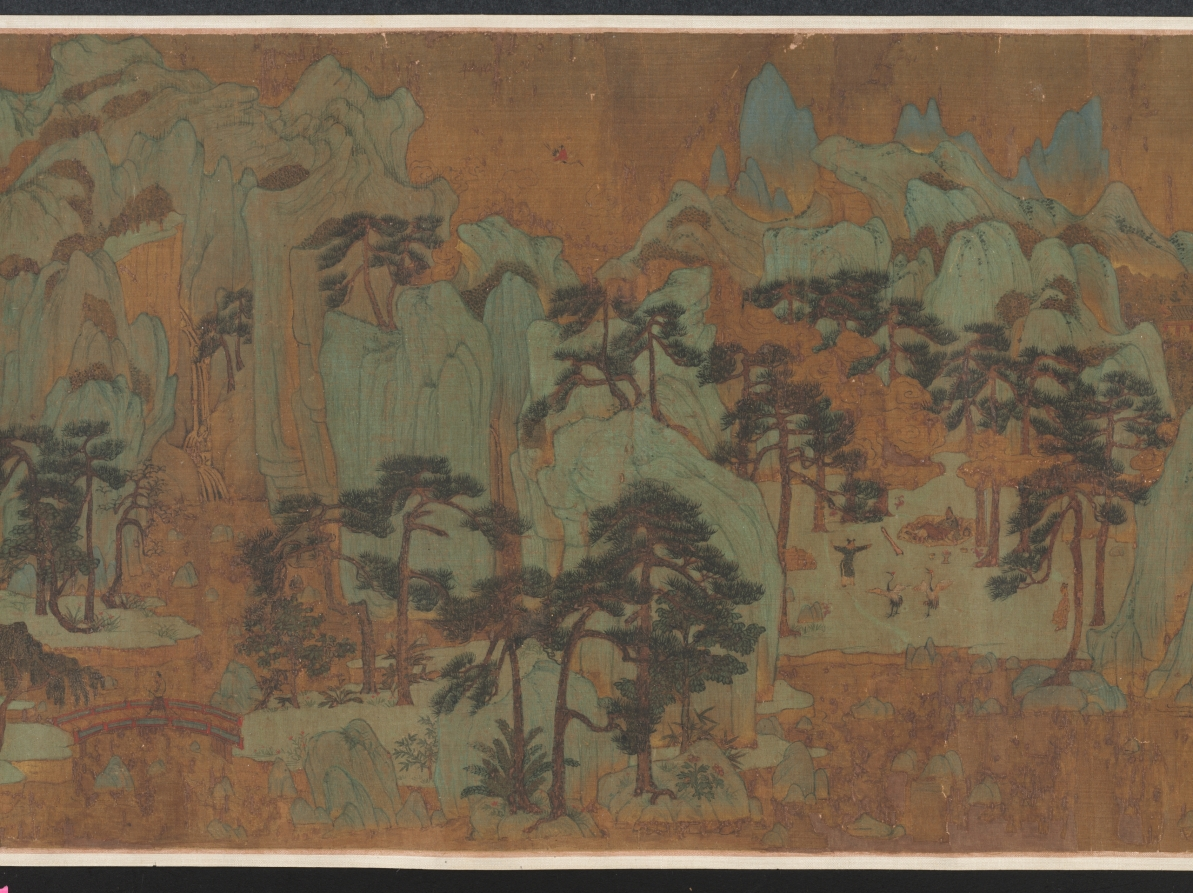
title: Mountains of the Immortals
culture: China, Yuan dynasty (1271-1368)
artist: Chen Ruyan (Chinese, c. 1331–1371)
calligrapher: Ni Zan (Chinese, 1301–1374)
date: 1300–1370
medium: Handscroll; ink and color on silk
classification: Painting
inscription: 1 inscription, 3 colophons, and 37 seals: 1 inscription, dated 1371, by Ni Zan 倪瓚 (1301-1374); 17 seals of Xiang Yuanbian 項元汴 (1525-1590); 4 seals of Chu Chih-ch'ih (late Ming Dynasty); 1 seal of Liang Qingbiao 梁淸標 (1620-1691); 1 seal of Gao Shiqi 高士奇 (1645-1704); 4 seals of Lu Xinyuan 陸心源 (1834-1894); 1 colophon, dated 1908, and 5 seals of Jing Xian 景贒; 1 colophon, dated 1915, by Lung Yu; 1 colophon, dated 1932, and 2 seals of Wu Mei; 3 seals unidentified.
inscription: 仙山圖， 陳君惟允所畫。 秀潤清遠， 深得趙榮祿筆意。 其人已矣， 今不可復得。 辛亥十二月二日倪瓚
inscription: Colophon by Jing Xian 景贒: The preceding Land of Immortals is an authentic work of the Yuan master, Chen Weiyun 陳惟允. According to the Yu yi bian 寓意編 by Du Mu 都穆of the Ming Dynasty, the painting was seen at the home of Chen Mengxian 陳孟賢 [c. 1500], a hermit. It is also recorded in Yu yi lu 寓意錄 of the present [Qing] era. The dimensions and the seals are all correct. When the painting went into the possession of Liang Qingbiao 梁淸標, the silk was already quite dilapidated. The only thing now missing, however, is the one line of writing by Xiang Zijing 項子京 [Xiang Yuanbian 項元汴] who records the original price he paid, being fifteen taels of silver. This must have been cut off by the dealer, which nevertheless did no harm to a masterpiece such as this. Jing Xian recorded this in the second month of the maoshen year [1908].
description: The landscape in deep green tones offers a view into a secluded mountain valley, populated by ancient figures surrounded by deer and cranes, all under high pine trees. A red-robed immortal in the air steers his crane toward the paradise land. This idyllic scene was presumably created amid the tumultuous transition from the Yuan to the Ming dynasty. Chen from Suzhou supported major rebel leaders, first Zhang Shicheng (1321–1367) with his base in Suzhou and then his rival Zhu Yuanzhang in Nanjing, after the latter had established the Ming dynasty. Chen was executed in 1371.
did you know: Such blue and green landscapes often evoke nostalgia for the idealized ancient times.